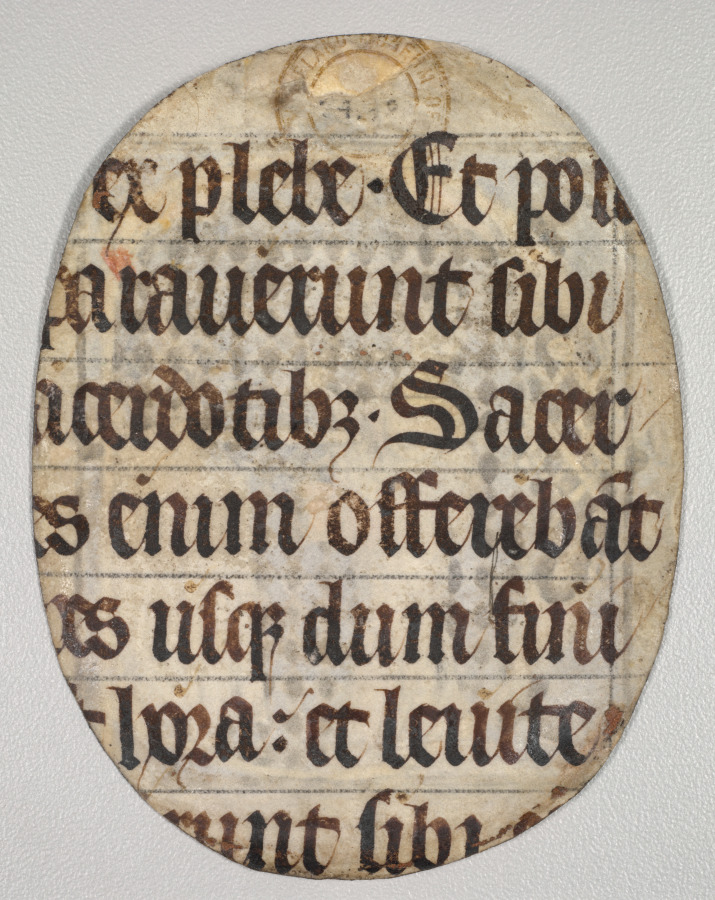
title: Fragment from a Lectern Bible: Initial E[t fecit Josias] with Josiah Aspersing the Altar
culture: France, Paris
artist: circle of Master Honoré (French, Paris, active 1288–1300)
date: c. 1300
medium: ink, tempera, and gold on vellum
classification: Manuscript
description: This initial comes from a large bible (about 23 inches high) and introduces the opening text of the Book of Esdras: Et fecit Josias in Jerosolymis Domino (When Josiah celebrated the Passover festival in Jerusalem to his Lord). The artist, a close follower of Master Honoré at Paris, set his figure against a diapered ground of alternating gold and blue diamonds with fleur-de-lys. Instead of portraying Josiah as a Jew, however, the artist abandoned historical perspective and painted him as a Christian priest sprinkling the altar with holy water in preparation for the Mass.